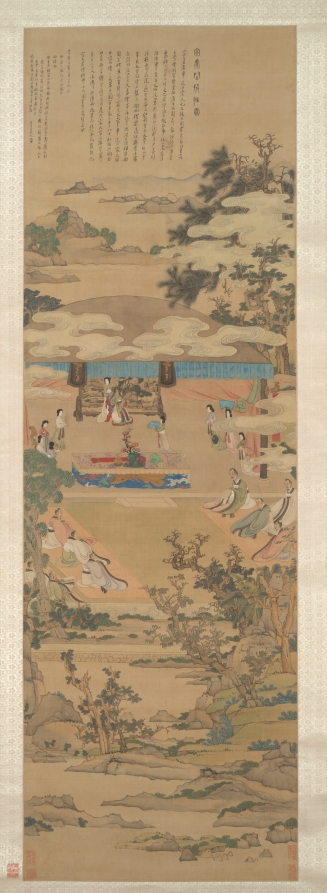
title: Lady Xuanwen Giving Instruction on the Rites of Zhou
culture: China, Ming dynasty (1368–1644)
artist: Chen Hongshou (Chinese, 1598/99–1652)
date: 1638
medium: Hanging scroll; ink and color on silk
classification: Painting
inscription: 宣文君者韋逞母宋氏也。父授以周官音義，曰：吾家世學傳周官。傳業相繼。此又周公所製，經紀〔典〕誥百官品物備於此矣。女可受之。君諷誦不輟。石帝徙山東。君乃推鹿車，背負父所授書到冀州。逞時年少。晝則採樵，夜則教逞。逞遂學成名立。仕符堅為太常。堅常幸其太學，問博士經典。乃憫禮樂遺缺。時博士盧壺對曰：廢學既久，書傳零落。比年綴撰，正經粗集。惟周官、禮經，未有其師。竊見太常韋逞母宋氏世學家，女傳其父業。得周官音義。今年八十。視聽無闕。非此母無可傳授後生。于是就宋氏家立講堂，置生員百二十人。隔絳紗縵而授業焉。拜宋氏爵，號為宣文君。賜侍婢十人。周官學後行于世。 崇禎戊寅八月二日，為綬姑六旬之辰。綬弟自成為姑偦。偕姑季女駱密、外孫楹、楠、楩、橒、楞、棅、孫女惠、漉酒上壽，屬綬圖寫，所以頌祝者。綬思宋母尚五胡之時，經藉屬之婦人；今太平有象，而秉杖名義者，獨綬姑爾。敬寫此圖，且厚望于弟紹焉。猶子洪綬九頓首。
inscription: 5 additional seals: 2 of Xu Weiren 徐渭仁(1788－1855); 2 of Sun Zutong 孫祖同 (1894–1937); 1 of C. C. Wang 王季遷 (1907–2003).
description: This painting by Chen Hongshou depicts the story of Xuanwen Jun, or Lady of Literary Propagation, at a venerable age, instructing young scholars on the Confucian classics. It was painted for Chen’s aunt in celebration of her 60th birthday. Chen’s painting style is archaic in the use of fine outlines and brilliant coloring with mineral pigments. In depicting the figures, he uses the “iron-wire” brush style (fine, even lines) with deliberate control. The faces are elongated and exaggerated. A few ritual bronzes lend the scene an antique flavor.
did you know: Chen Hongshou's long inscription at the top of the painting compares his virtuous aunt with the historical exemplar, Lady Xuanwen.